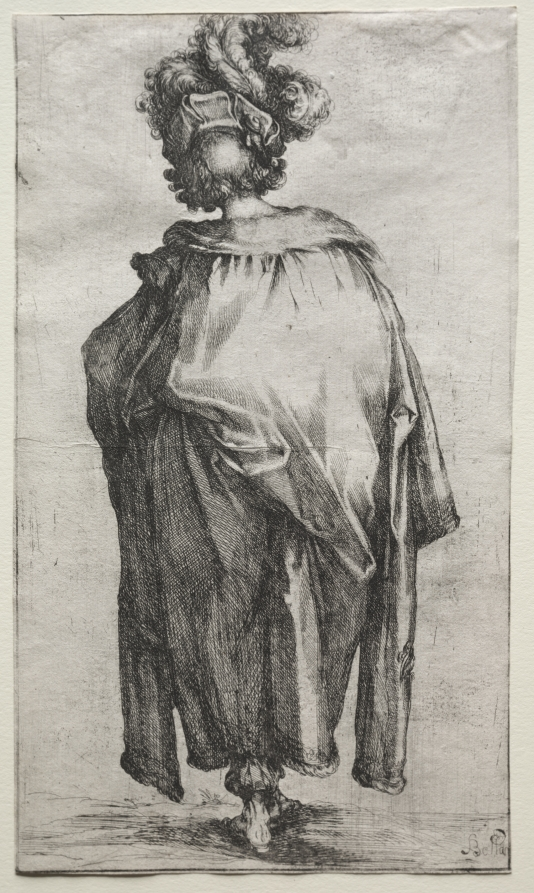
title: The Three Magi: Melchior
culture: France, 17th century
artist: Jacques Bellange (French, c. 1575–1616)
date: c. 1615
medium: etching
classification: Print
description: Bellange portrayed each of the three Magi—Balthasar, Melchior, and Caspar—as a single-figure print.